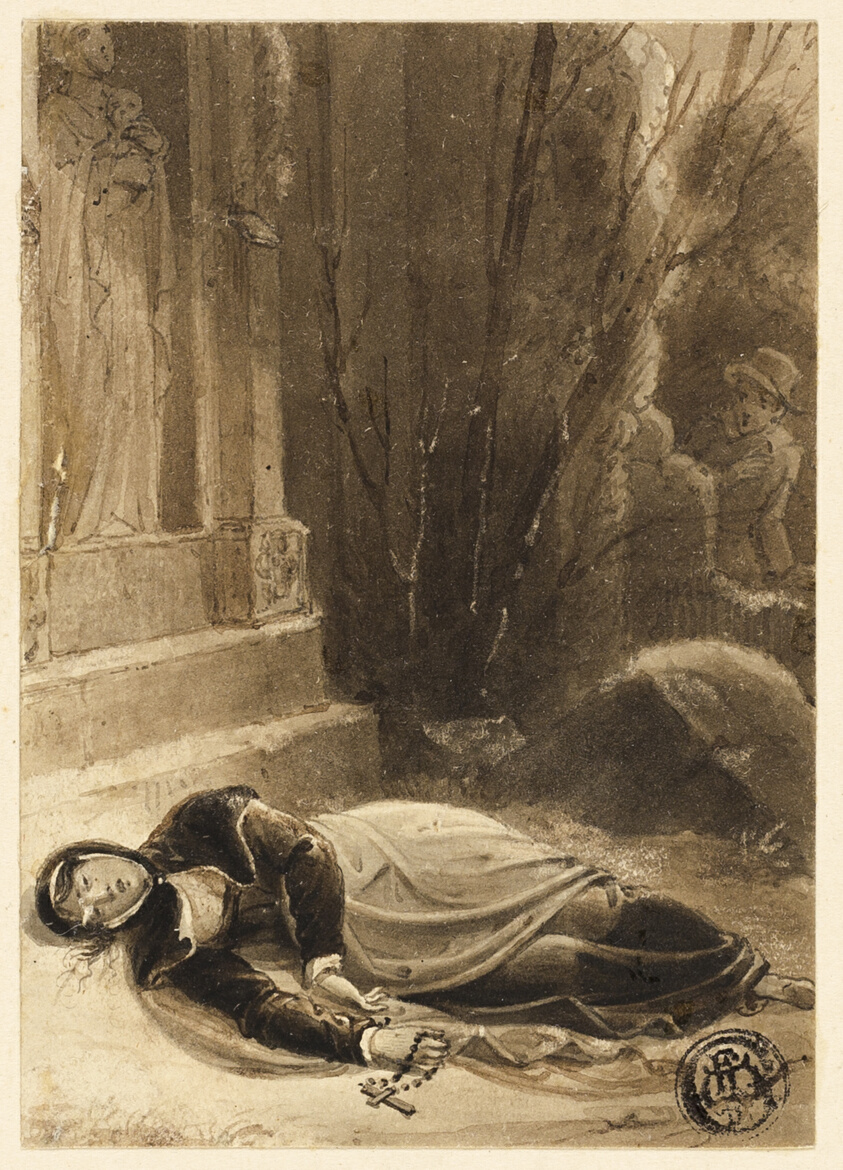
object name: Drawing and Watercolor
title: Lady of the Lake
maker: Richard Westall (English, 1765-1836)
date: 1785/1834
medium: Pen and brown ink with brush and gray and brown wash, heightened with touches of white gouache, on cream wove paper, laid down on board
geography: England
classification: ink or chalk wash; drawings (visual works); prints and drawing